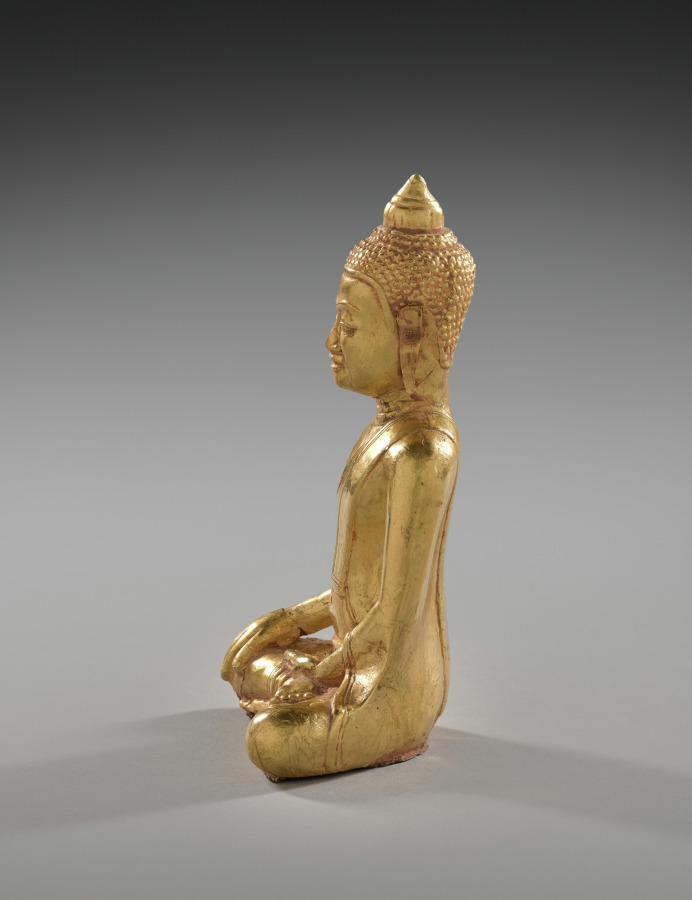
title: Seated Buddha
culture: Thailand, Ayutthaya, Wat Ratchaburana, 14th century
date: before 1424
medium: gold with resin core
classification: Sculpture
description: This pristinely modeled Buddha was fashioned from a sheet of 24-karat gold, using the repoussé (hammering) technique. The figure is filled inside with a resin core. The style is typical of the last phase of Khmer art (800s–1400s), the Lapburi style, which combines characteristics of both Cambodian and Thai sculptural styles.